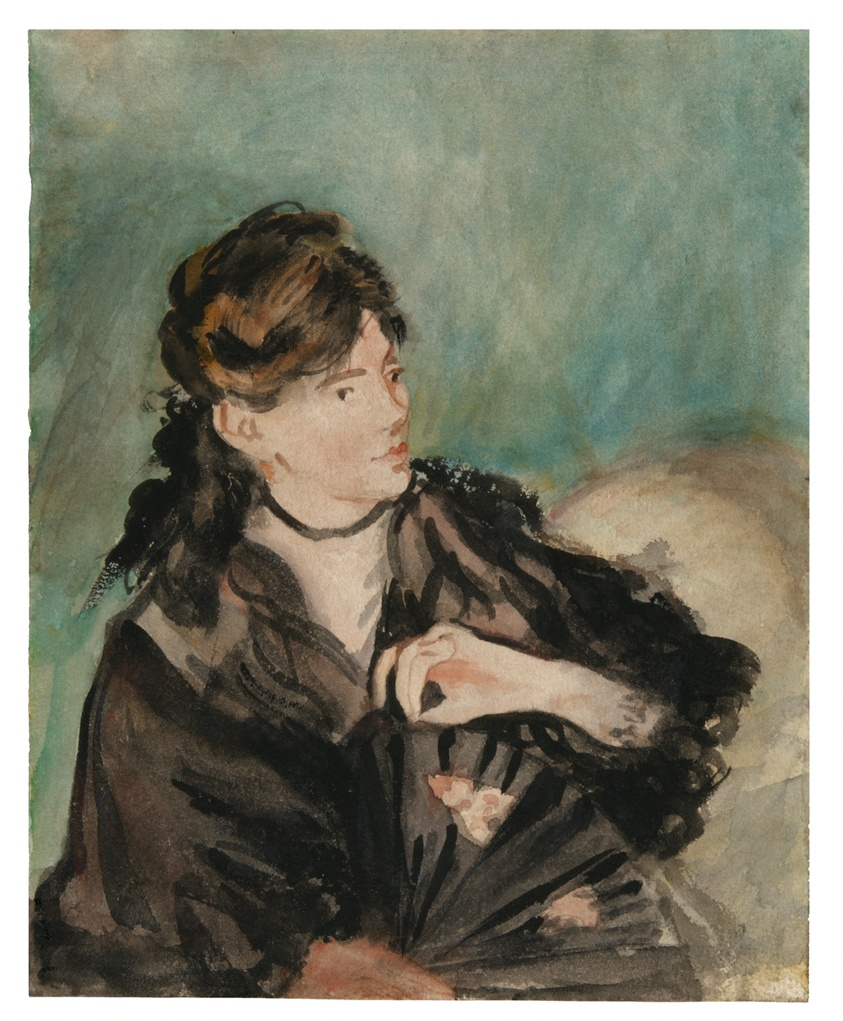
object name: Drawing and Watercolor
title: Portrait of Berthe Morisot with a Fan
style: Impressionism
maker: Édouard Manet (French, 1832-1883)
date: 1874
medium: Watercolor over traces of graphite on cream wove paper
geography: France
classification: watercolor; drawings (visual works); prints and drawing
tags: women, portraits